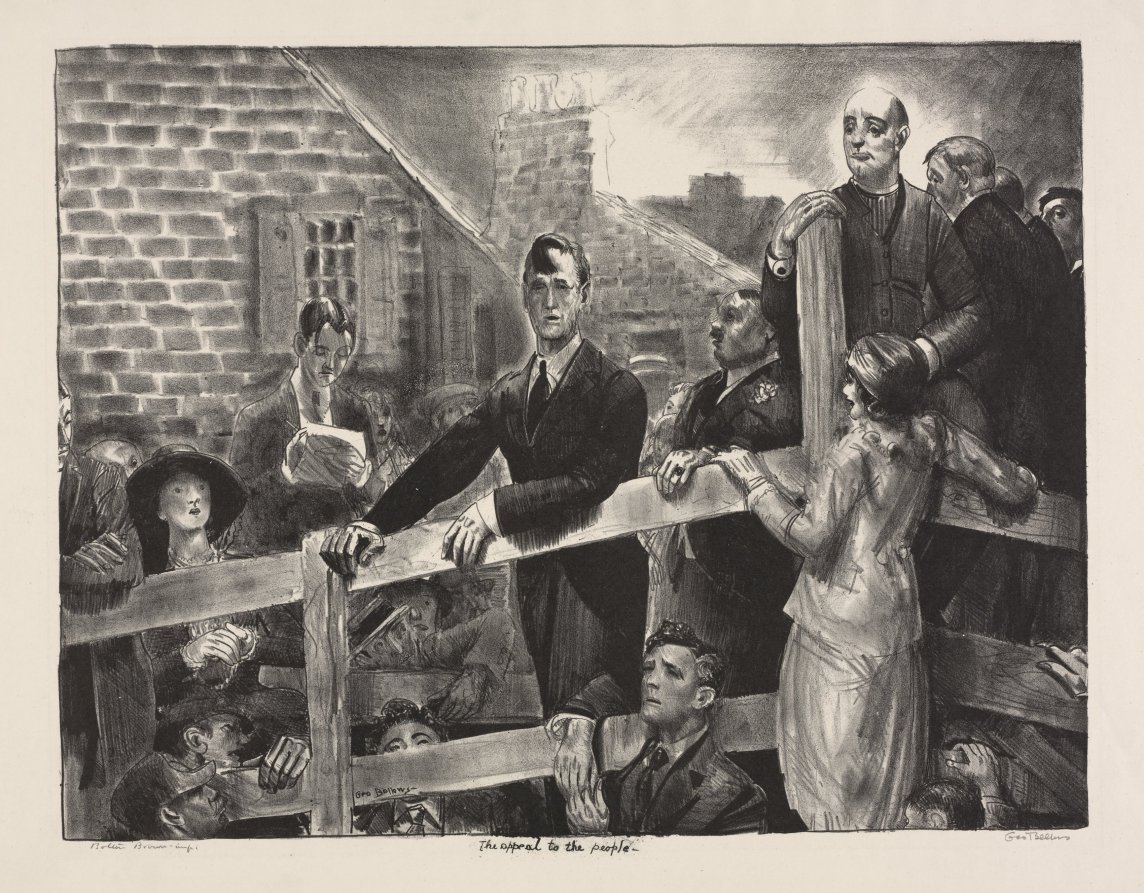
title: The Appeal to the People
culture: America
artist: George Bellows (American, 1882–1925)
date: 1924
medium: lithograph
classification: Print